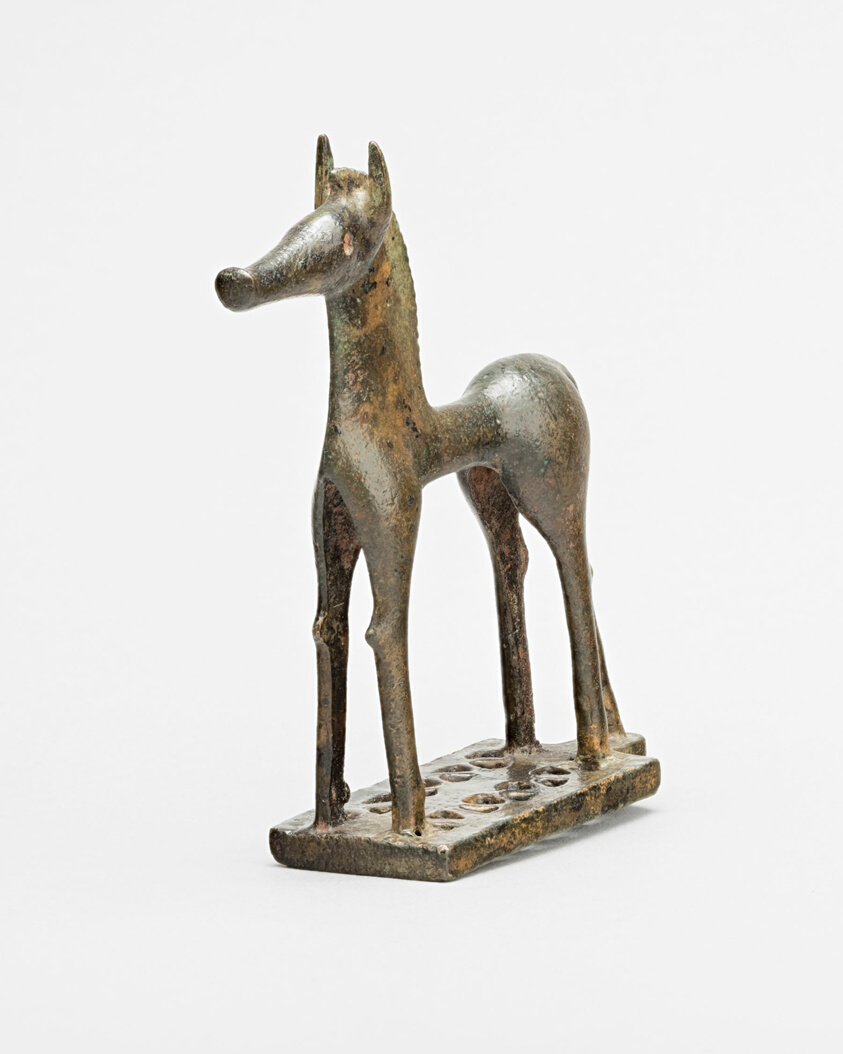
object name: Sculpture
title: Statuette of a Horse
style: archaic (greek), ancient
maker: Greek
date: 750-730 BCE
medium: Bronze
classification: votive offering; ancient art; sculpture; ritual objects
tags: horse, animals